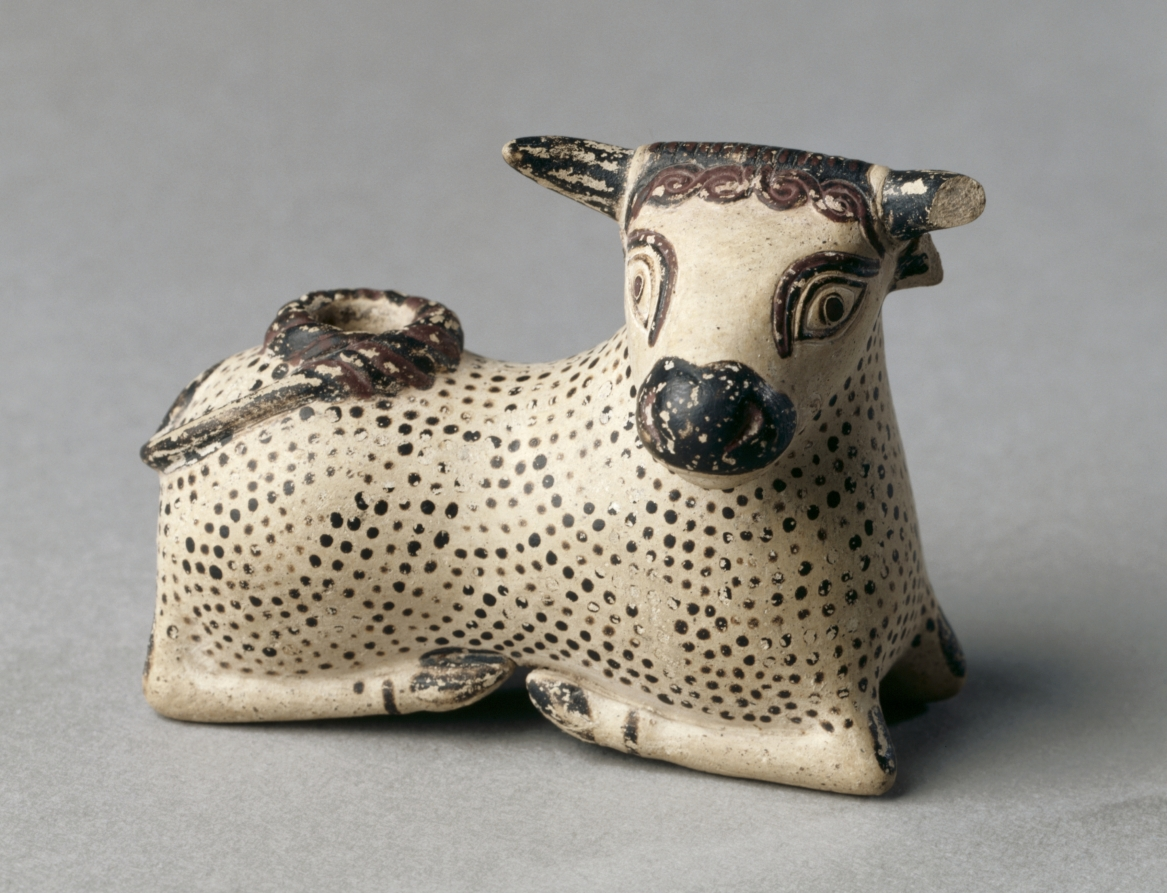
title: Oil Flask in the Shape of a Bull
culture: Greek, Corinthian or modern forgery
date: 600–575 BCE or 1900s CE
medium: ceramic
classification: Ceramic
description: This small bull-shaped flask is similar in form and painted decoration to a class of figure-shaped perfume vessels created during the late seventh and early sixth centuries BC in Greece and Italy (especially Corinth, Rhodes, and Etruria). The stippled body decoration characterizes such vases from multiple sites, while the light-colored clay and inconspicuous orifice placement are typical of Corinth. But no other reclining bulls are known among such vases (and only a few bullheads or upper bodies), raising questions about authenticity. A 1986 analysis determined that this object had been recently fired, and a 2020 clay analysis placed its origin in the Catalonia region of Spain, far from any known ancient production area for such flasks.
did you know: The curled tail masks a filling hole atop the back.